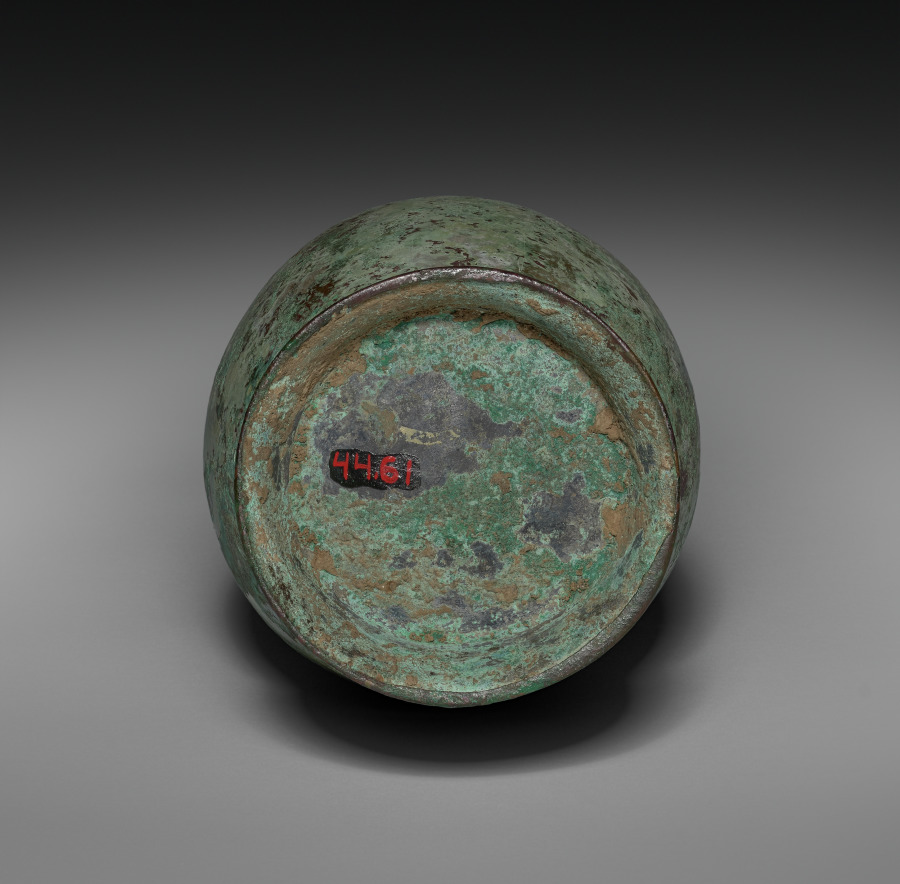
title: Wine Vessel (Hu)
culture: China, Western Zhou dynasty (c. 1046–771 BCE)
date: c. 1000–900 BCE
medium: bronze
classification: Metalwork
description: This tall, slender bronze wine vessel, called a hu, has three bands of ornamentation: one above the foot, one around the neck, and one on the cover. Stylized birds or phoenixes are in the band around the neck, while the band on the cover and foot feature geometric dragons. The dragon and the phoenix may represent the Yin and Yang and would be equally appropriate on a bronze of either secular or religious purposes. When inverted, the cover forms a cup. It likely held liquids like wine at festive banquets or religious ceremonies.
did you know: The cylindrical "handles" suggest that the vessel was carried by a cord.